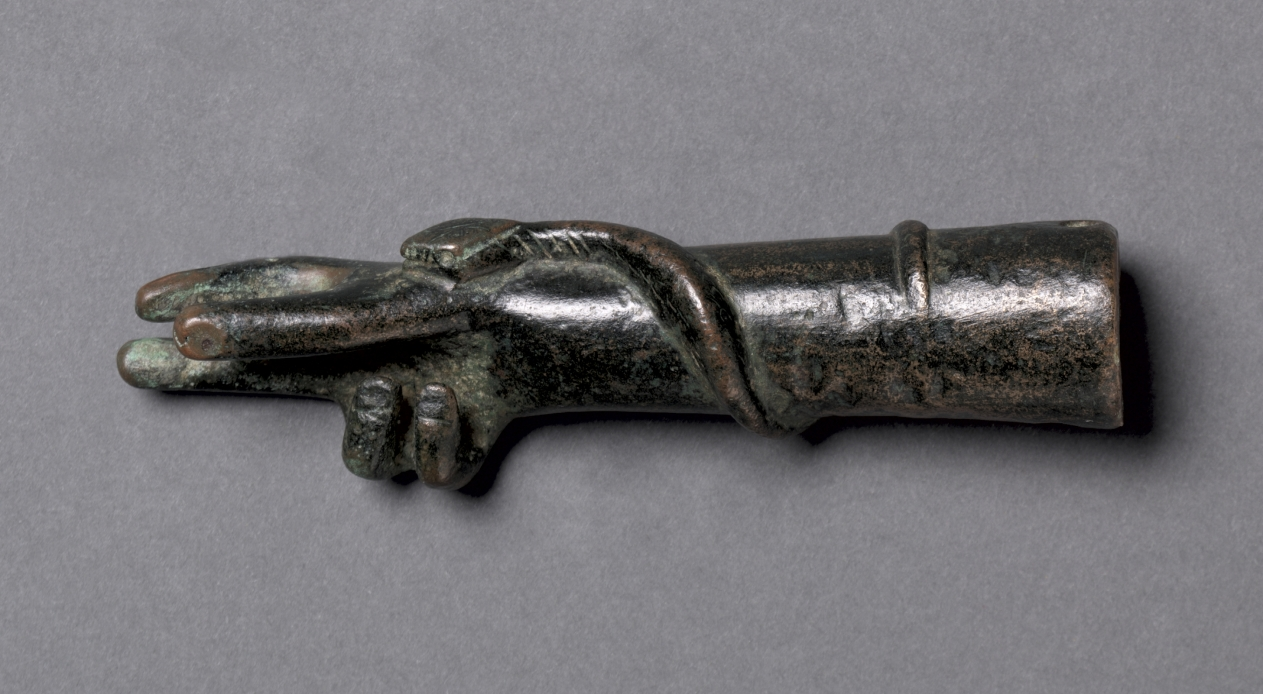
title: Votive Arm and Hand of Zeus Sabazios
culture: Italy, Roman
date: 1–200 CE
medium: bronze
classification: Jewelry